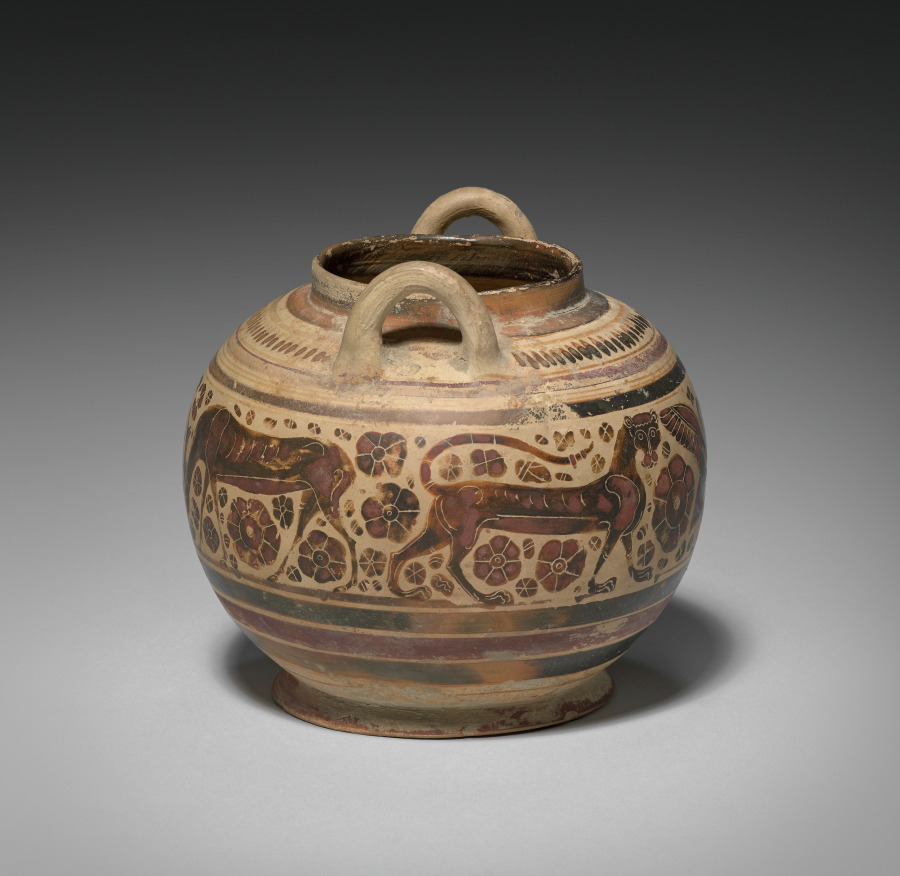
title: Corinthian Vase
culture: Greece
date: 600s BCE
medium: earthenware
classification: Ceramic